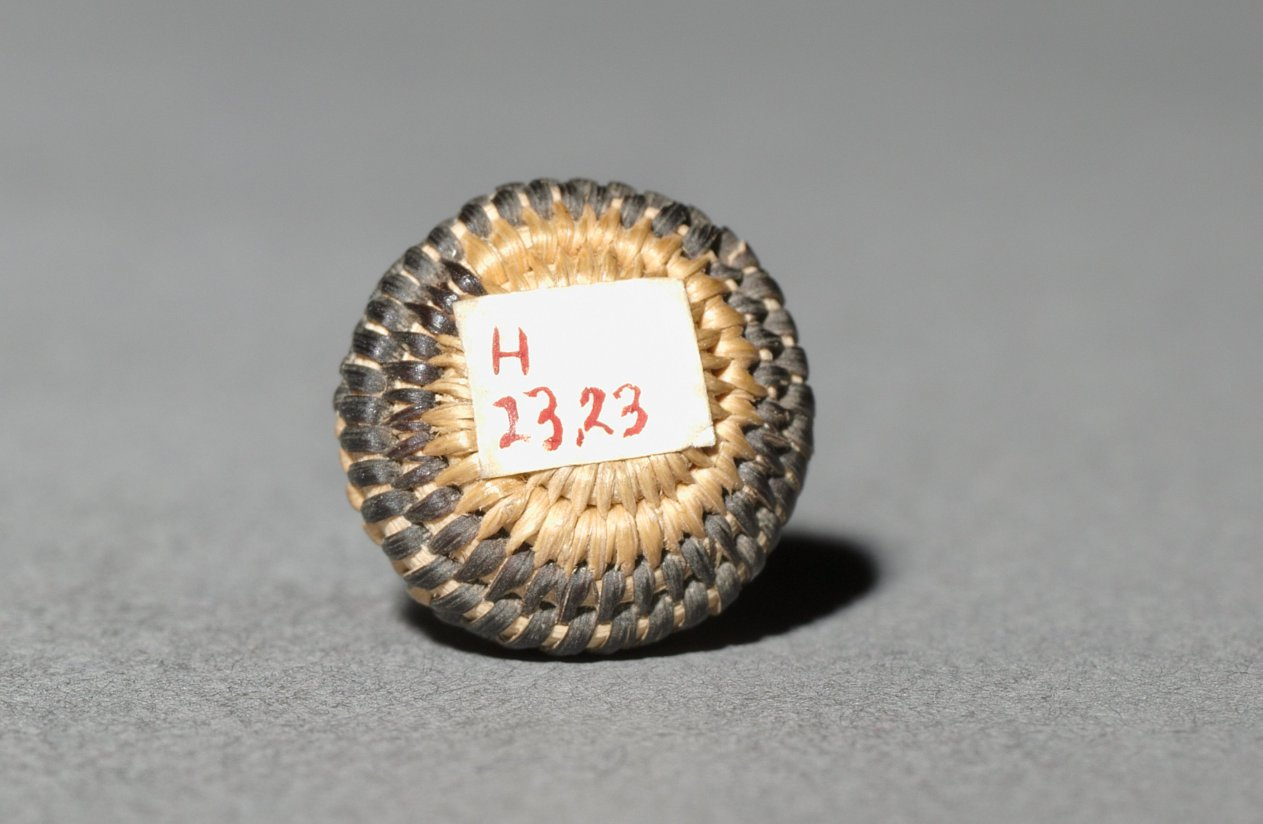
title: Miniature Basket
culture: America, Native North American, Southwest, Arizona, Akimel O'odham (Pima), Unassigned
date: before 1923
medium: plant fiber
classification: Basketry